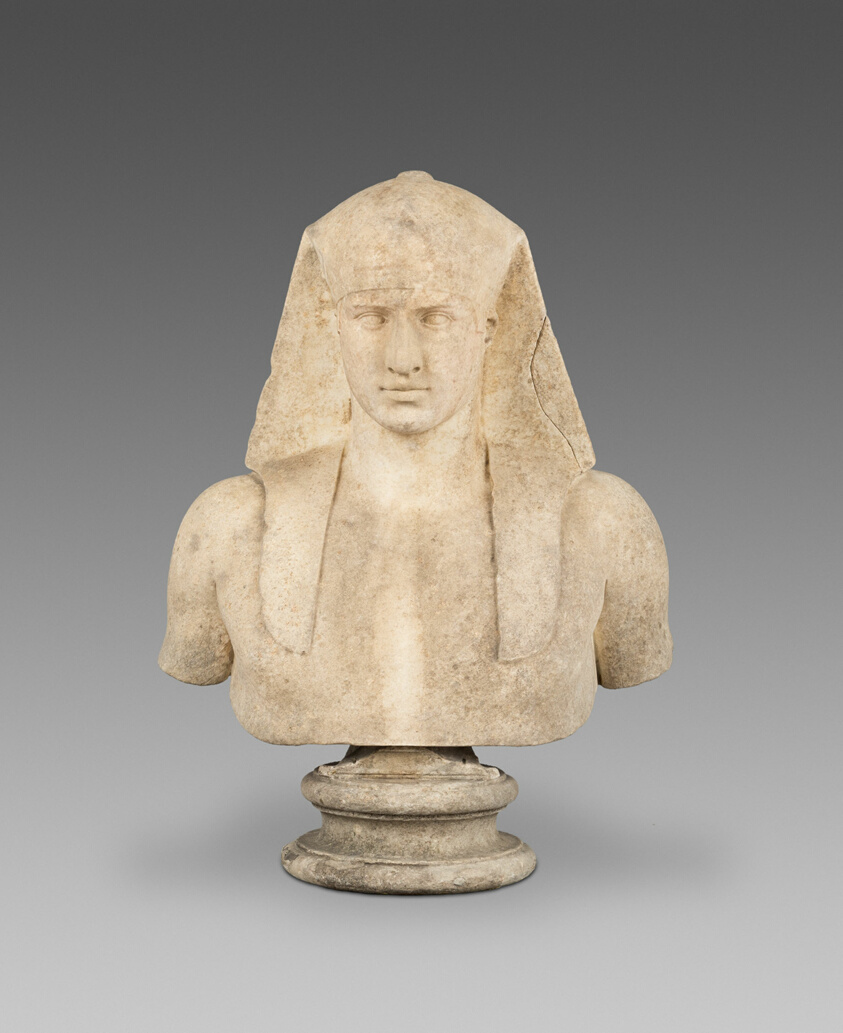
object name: Sculpture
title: Portrait Bust of Antinous as Osiris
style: imperial (roman), roman (ancient, style or period)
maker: Roman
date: 130-138, with 21st–century English restorations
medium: Marble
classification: sculpture; bust/head; ancient art; marble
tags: gods (deities)